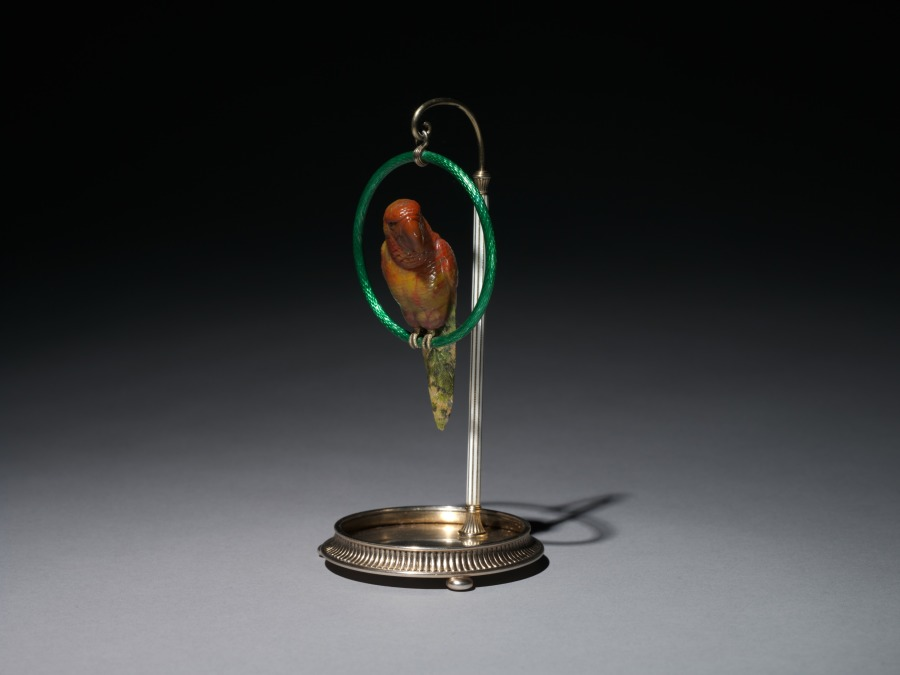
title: Parrot on a Perch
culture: Russia, St. Petersburg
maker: House of Fabergé (Russian, 1842–1918)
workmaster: Mikhail Evlampievich Perkhin (Russian, 1860–1903)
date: 1896–1903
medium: silver, enamel, jasper, agate, emeralds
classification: Miscellaneous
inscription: 88, Kokoshnik, tester's initials (in Cyrillic) [assay mark for St. Petersburg, 1896-1908]; initials of workmaster Mikhail Perkhin (in Cyrillic); Fabergé (in Cyrillic); 6817 scratched.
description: In creating luxurious accessories for a desk or tabletop, Fabergé often used native hardstones such as multicolored agate and jasper, green nephrite, pink rhodonite, and rock crystal found in the Ural Mountains of western Russia. By paying careful attention to the unique colors and textures of the stones, Fabergé and his craftsmen brought them to life, turning milky agate into a begging poodle or green and black jasper into this parrot sitting on a perch. The use of native materials also promoted Russian nationalism, which appealed greatly to the tsar and his family.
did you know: Tsar Nicholas and his cousins in the British royal family kept parrots and parakeets throughout their many palaces.